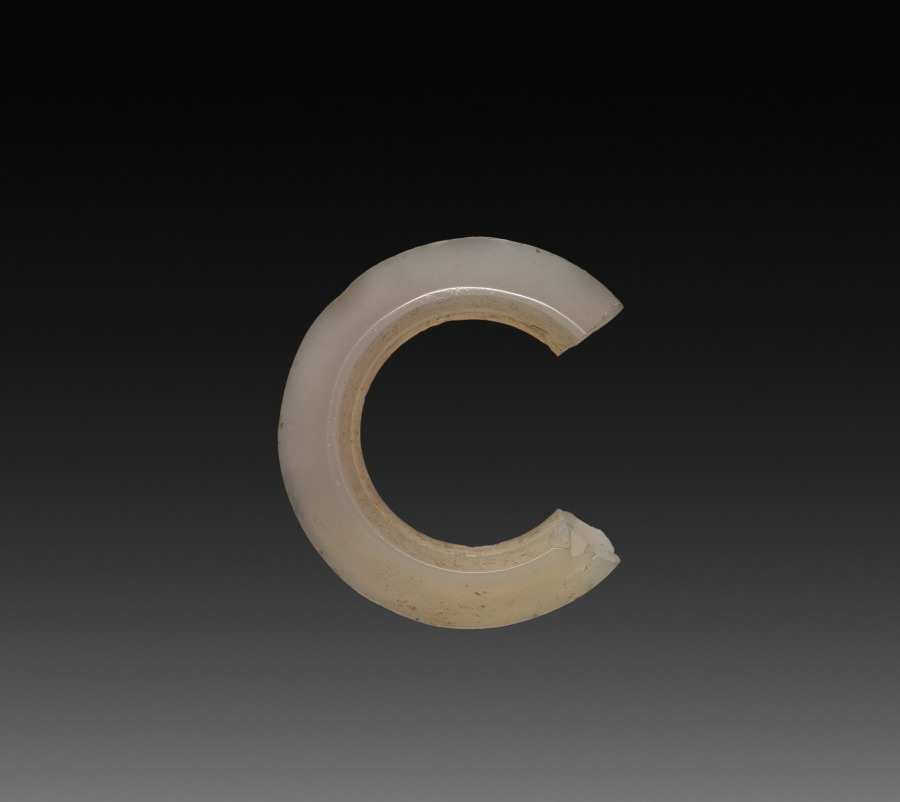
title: Ring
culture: China, Han dynasty (202 BCE–220 CE) or later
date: 200 CE or later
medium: agate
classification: Jewelry